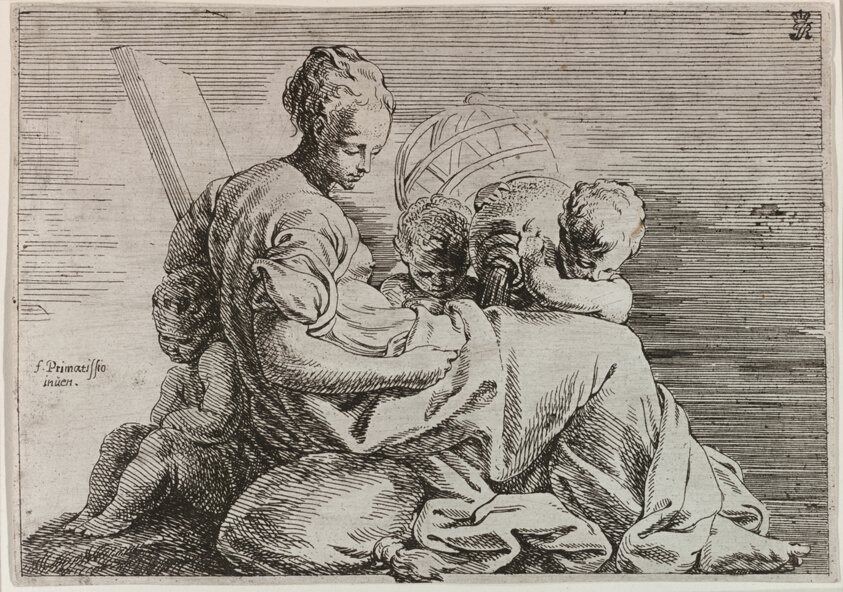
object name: Print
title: Astronomy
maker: Eloy Bonnejonne (Flemish, c. 1630-1695); after Francesco Primaticcio (Italian, 1504-1570)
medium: Etching printed in black on paper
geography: Flanders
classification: print; prints and drawing